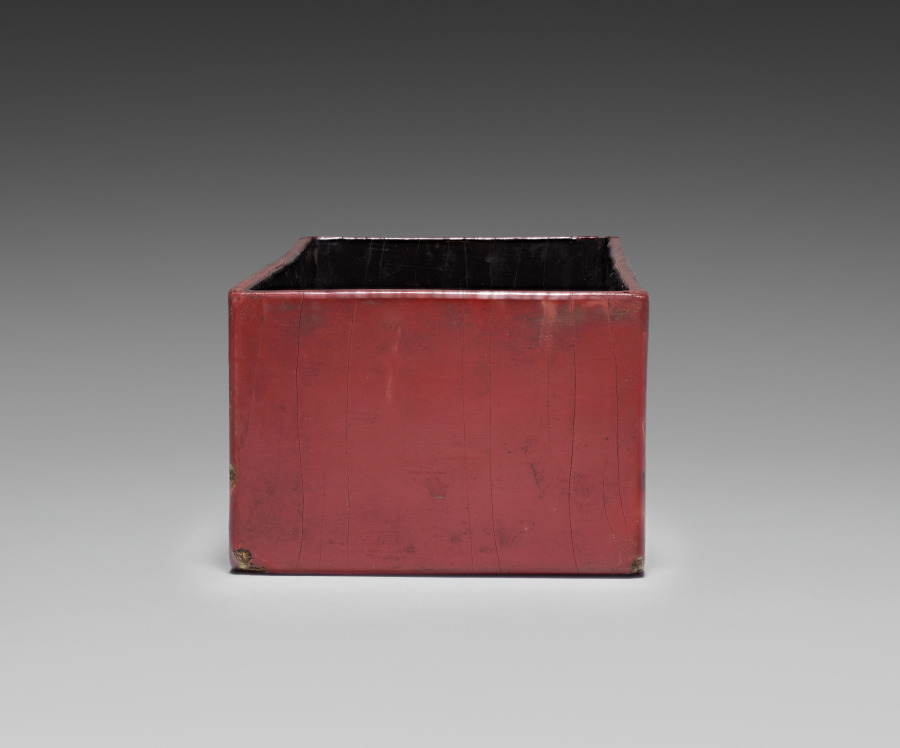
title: Drawer for a Tihong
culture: China, Ming dynasty (1368-1644), Wanli reign (1572-1620)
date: 1585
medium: carved cinnabar lacquer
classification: Lacquer